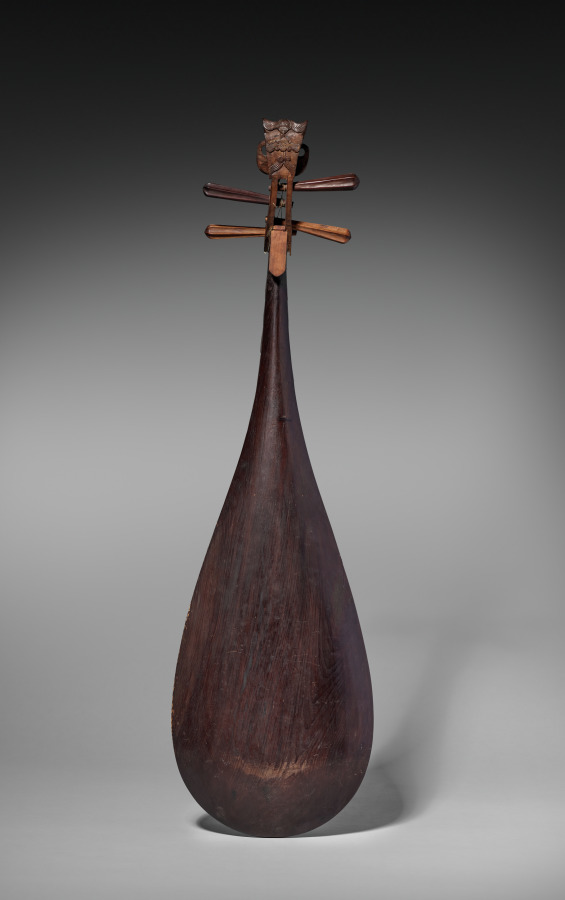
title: Pipa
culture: China, Qing dynasty (1644-1911)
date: 1800s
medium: Wood, ivory, bone, gut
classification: Musical Instrument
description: The term pipa, known since the 3rd century BC, describes the playing motion of the right hand: pi, “to play forward” (left), and pa, “to play backward” (right). A type of lute played with the fingers, it is used in opera and storytelling ensembles and has an impressive, virtuosic solo repertoire. Historic imagery, such as wall paintings, documents the spread of the pipa, along the Silk Road from western and central Asia to China. The bat finial here is a commonly used device on 19th-century Chinese lutes symbolizing good luck.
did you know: The string holder is made of bone.